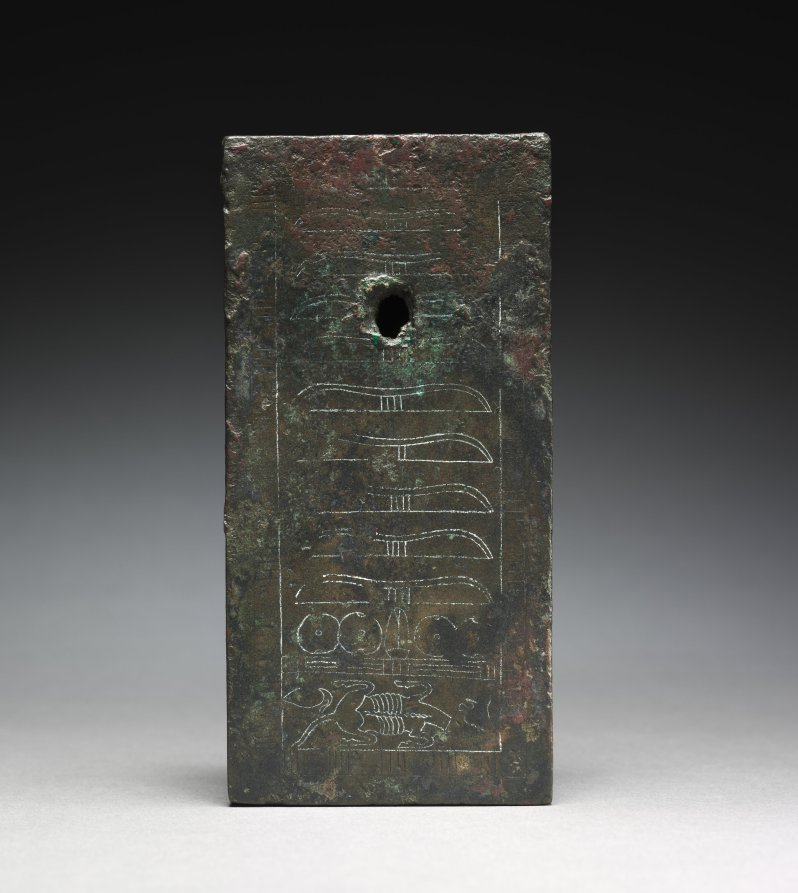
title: Statue Base Dedicated to Amen-Ra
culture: Egypt, Late period (715–332 BCE), Dynasty 26 or later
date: 664–525 BCE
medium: bronze, hollow cast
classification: Sculpture